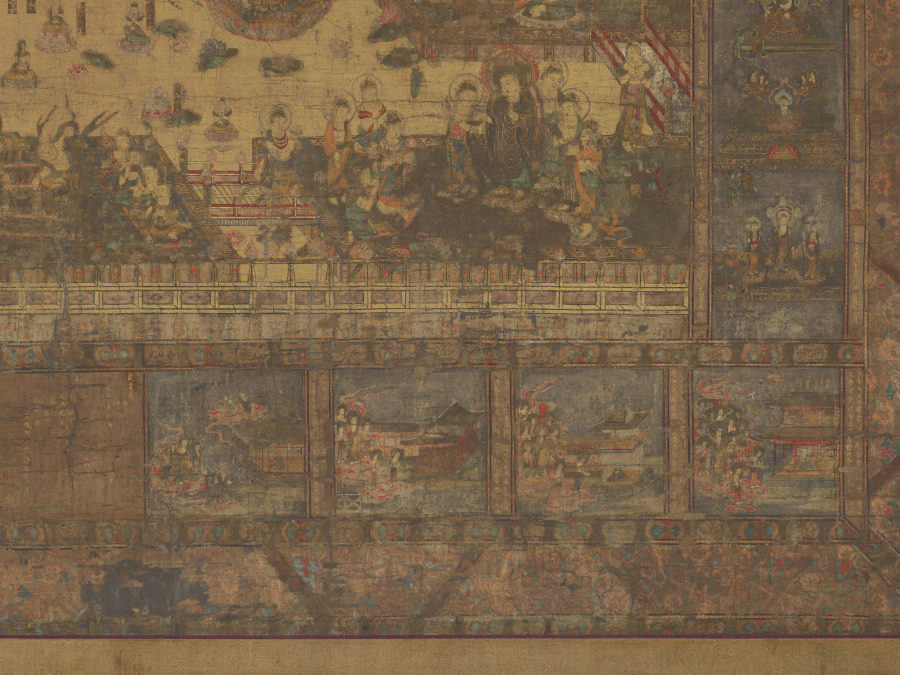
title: Taima Mandala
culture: Japan, Kamakura period (1185–1333)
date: early 1300s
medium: hanging scroll; ink, color, and gold on silk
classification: Painting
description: This painting is a copy after an 8th-century woven mandala belonging to the temple Taimadera. The composition is based on a sacred text that describes the Buddha Shakyamuni’s explanation of Amida’s Pure Land to Queen Vaidehi, as well as his instructions to her on visual meditation upon the Pure Land. The Pure Land appears at the center of the painting. To the left is the story of Queen Vaidehi’s encounter with Shakyamuni, and to the right are the scenes she is given to visualize. The bottom illustrates the nine levels of birth that can be attained in the Pure Land.